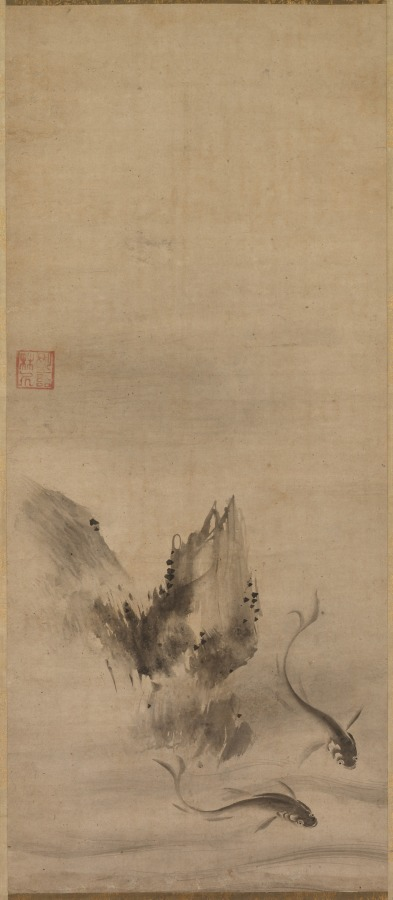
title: Fish and Rock; Fish and Seaweed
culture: Japan, Momoyama period (1573–1615)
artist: Rinkyo (Japanese)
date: 1573–1615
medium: pair of hanging scrolls; ink on paper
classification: Painting